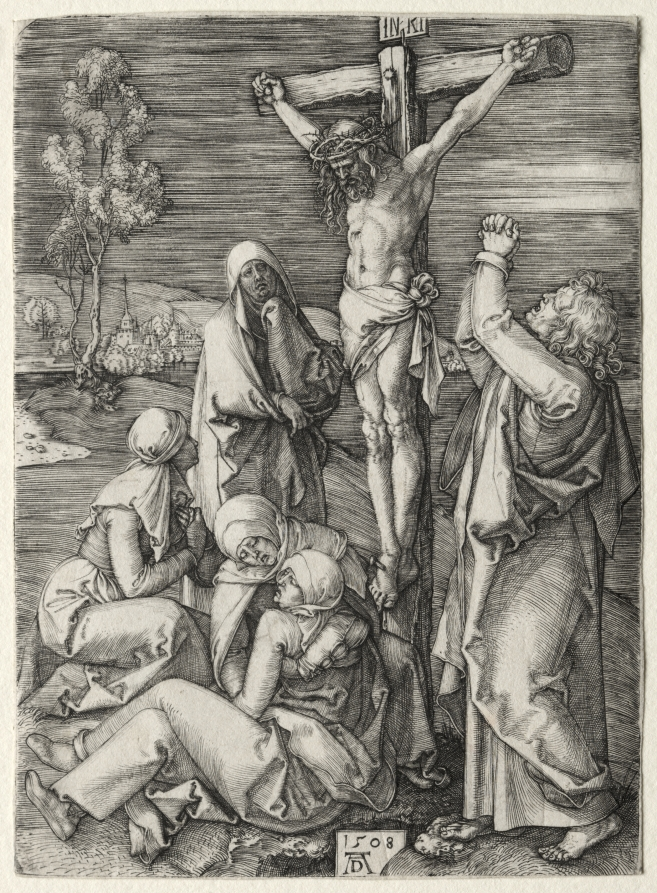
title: The Crucifixion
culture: Germany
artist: Albrecht Dürer (German, 1471–1528)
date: 1508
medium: engraving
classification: Print